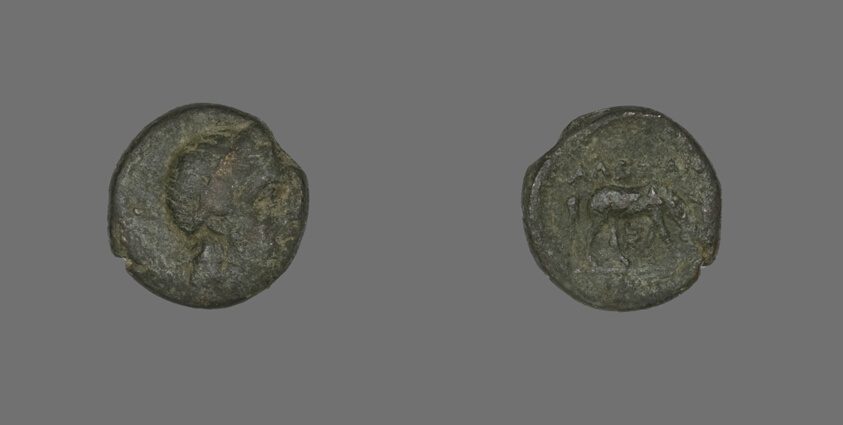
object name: Coin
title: Coin Depicting the God Apollo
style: greek, ancient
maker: Greek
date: about 300 BCE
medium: Bronze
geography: Ancient Greece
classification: coin; ancient art